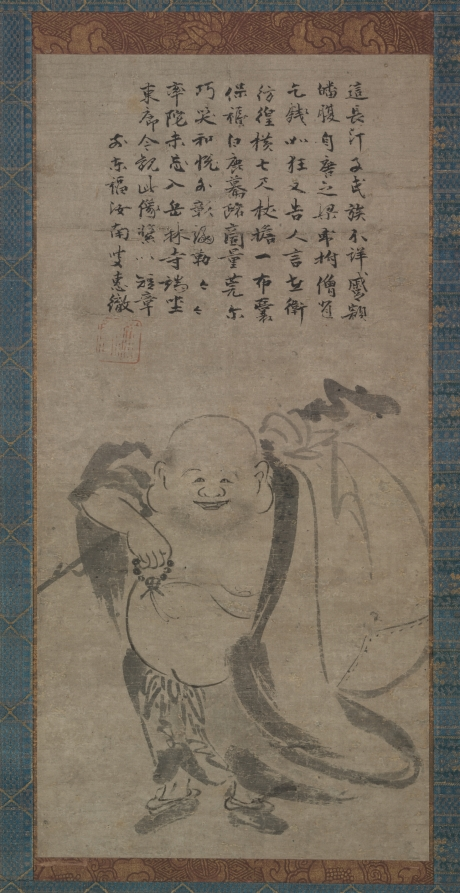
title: Budai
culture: Japan, Muromachi period (1392–1573)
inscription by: Jonan Etetsu (Japanese, 1444–1507)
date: late 1400s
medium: hanging scroll; ink on paper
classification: Painting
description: The Zen monk Jonan Etetsu is recorded as the 183rd abbot of Tō fuku-ji temple in the eastern hills of Kyoto, one of the earliest and most influential Zen institutions in medieval Japan. Otherwise, the only biographical information known to date has been gleaned from a few inscriptions on paintings documenting his friendship with another eminent monk, Ryō ’an Keigo (1425–1514), and two paintings bearing Jonan’s own poetic inscriptions. This image of Hotei (Chinese: Budai), a legendary, 10th-century Chan (Zen) monk, is one of those paintings. In Japan the image of the mirthful, pot-bellied Hotei enjoyed great popularity from the 14th century onward. Zen literature and popular folklore merged to create a storehouse of attractive fiction concerning this delightful character’s worldly adventures as a kind of itinerant Santa Claus and more symbolically as the future Buddha, Miroku, in disguise. For the Japanese, Hotei came to represent an unfettered path to spiritual enlightenment. The identity of the artist of this painting is unknown, although it may have been Etetsu, who attained a high rank within the 15th-century Zen community.